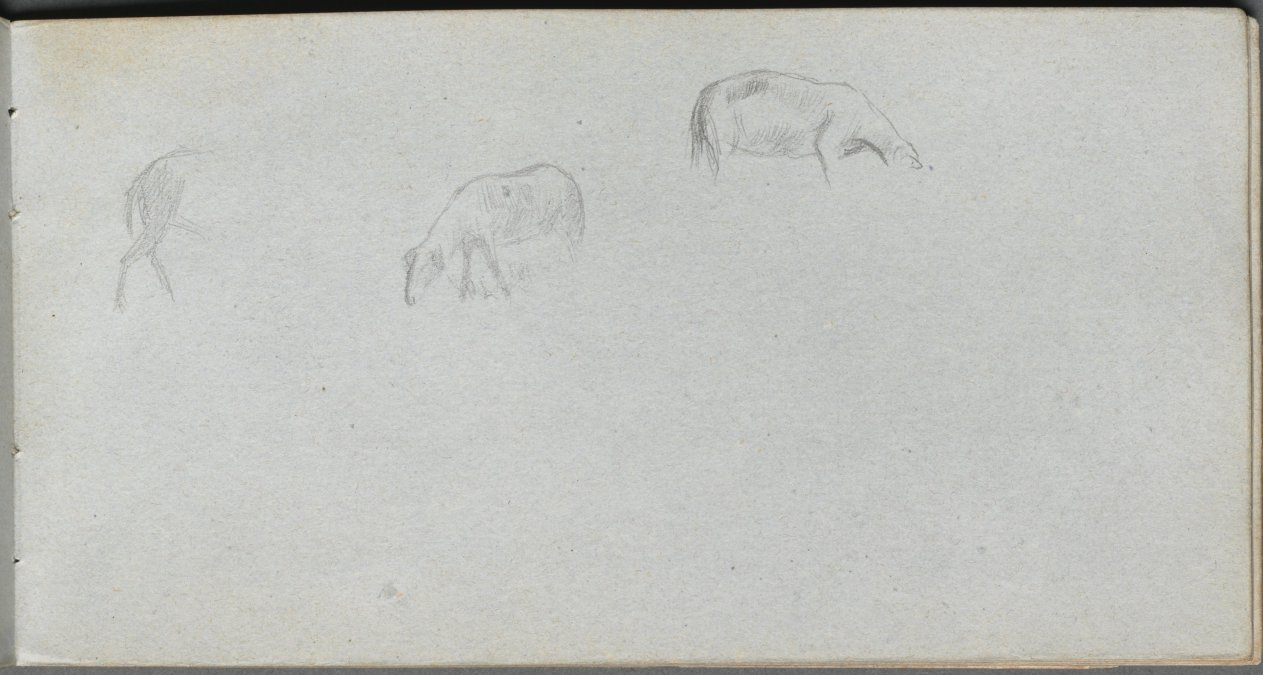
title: Sketchbook, page 20: Animal Study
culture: France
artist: Ernest Meissonier (French, 1815–1891)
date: c. 1860s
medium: graphite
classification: Bound Volume